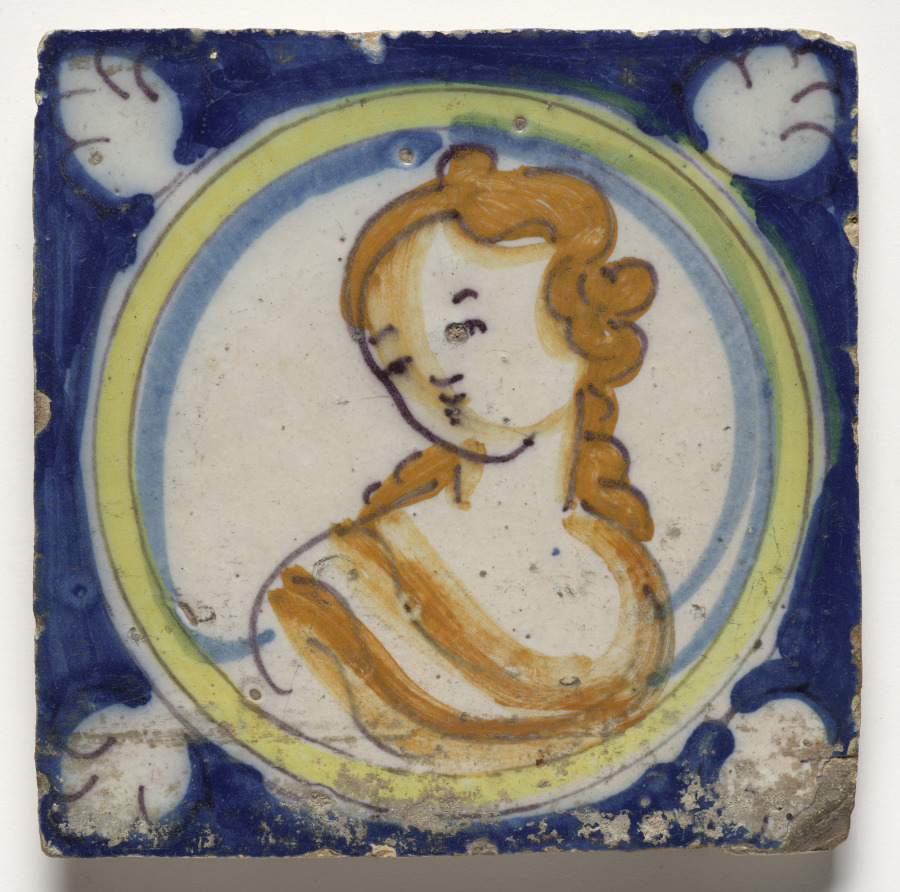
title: Wall Tile–Female Bust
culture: Spain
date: c. 1600s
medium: glazed ceramic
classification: Ceramic